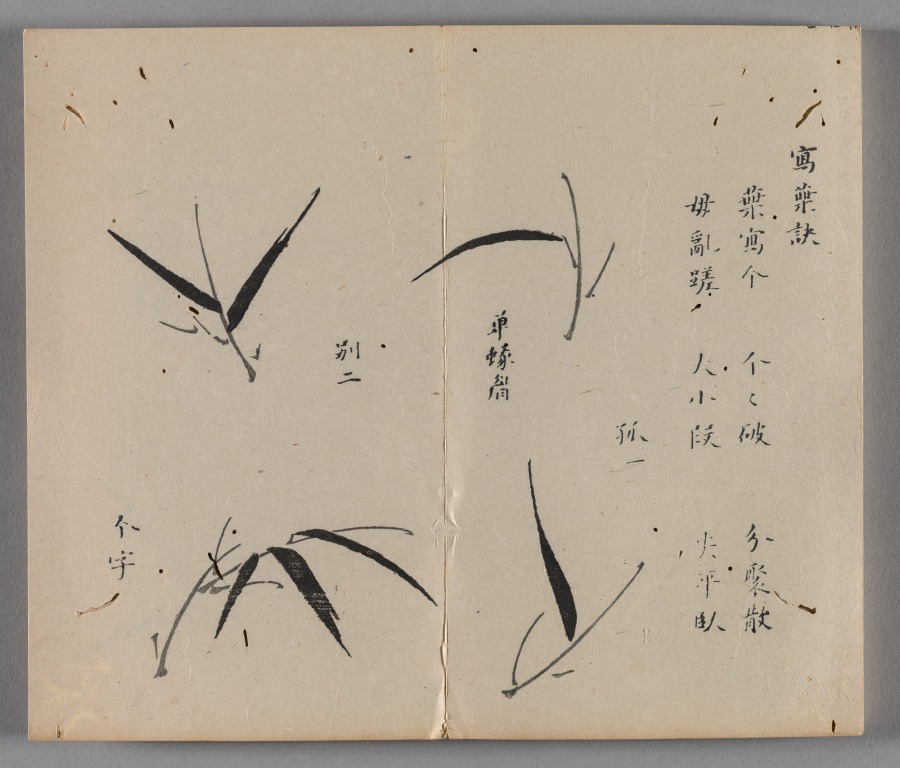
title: Ten Bamboo Studio Painting and Calligraphy Handbook (Shizhuzhai shuhua pu): Bamboo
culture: China, Qing dynasty (1644-1911)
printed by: Hu Zhengyan (Chinese, c. 1584–1674)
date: 1633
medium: Woodblock-printed book; ink and colors on paper; first edition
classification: Print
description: Color printing reached a level of perfection in the early 1600s, as seen in this Ten Bamboo Studio Collection of Calligraphy and Painting and the Mustard Seed Garden Manual of Painting (printed 1679 and 1701). The painterly quality, precision in registering (aligning) the woodblocks, and harmonious colors made them the most successful color print editions in Chinese history. Both editions were printed and compiled in Nanjing, spread nationwide, and had a great impact on the arts in Japan and Korea.